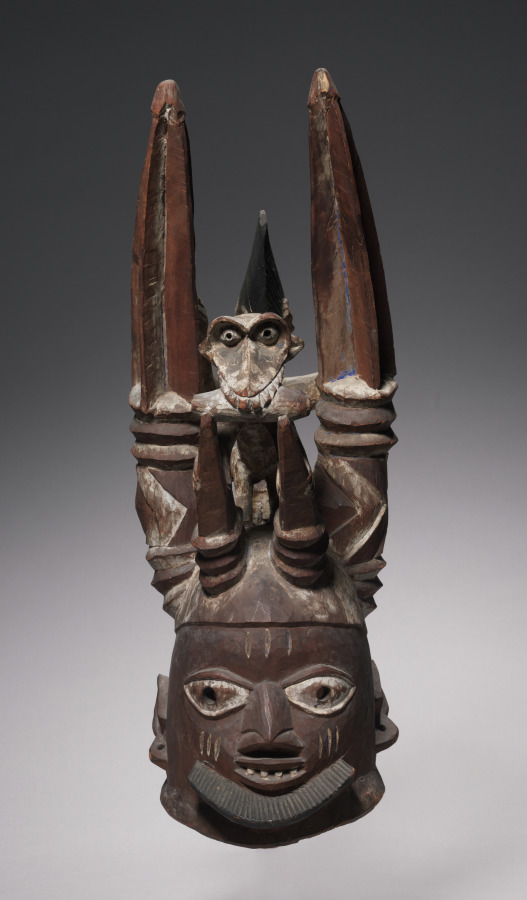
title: Helmet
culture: Africa, West Africa, Nigeria, Yorùbá-style maker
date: late 1800s–early 1900s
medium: Wood and paint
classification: Mask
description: This type of helmet used by the Oro association, is often mistaken for the more common Egungun. While Egungun masquerades are performed to honor an individual's ancestors, Oro masquerades are performed in conjunction with the actual funeral of a Yoruba person. The Oro association is very secretive, and the visibility of helmets like this one is generally restricted. Oro is also responsible for carrying out criminal sentences, such as collecting fines, repossessing goods, and executing those convicted of a capital crime. The female figure suspended from the back of the horns may reference the victims of Oro executions. This work has been attributed to the Esubiyi School of Abeokuta, founded about 1860.